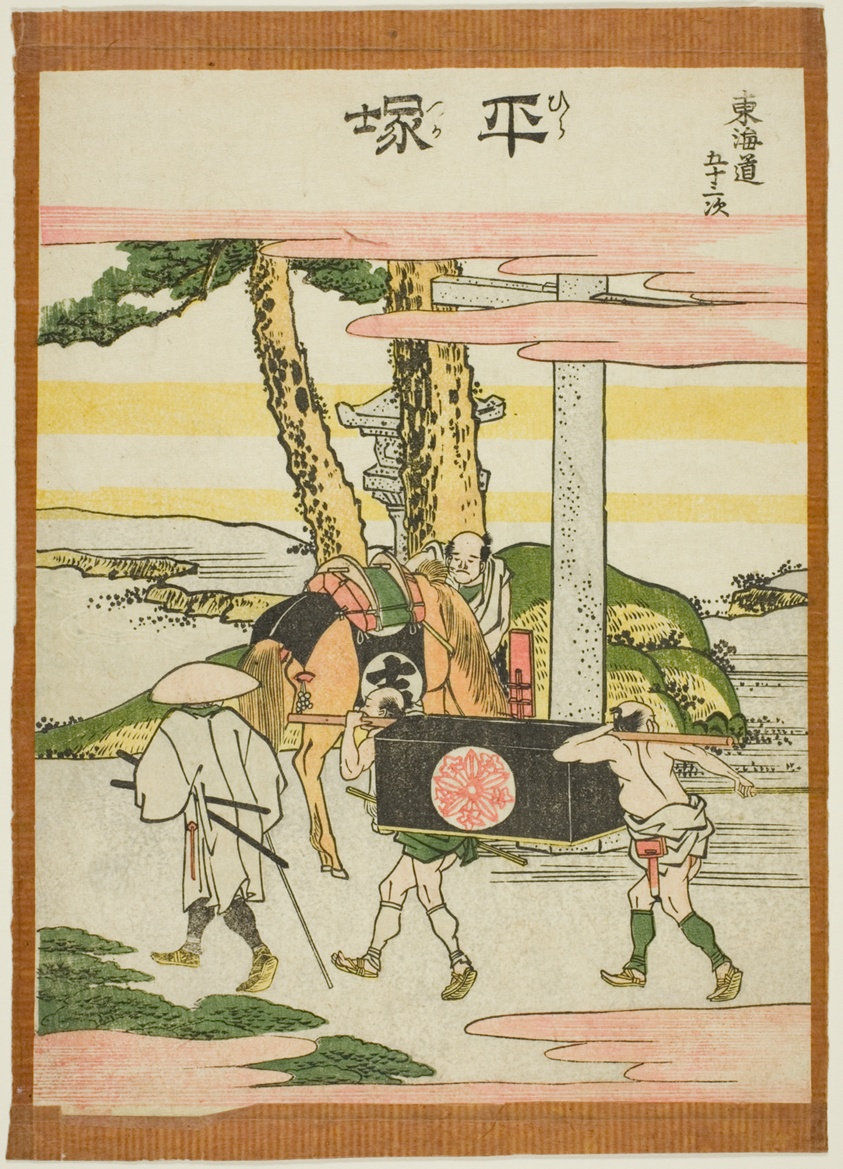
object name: Print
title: Hiratsuka, from the series "Fifty-three Stations of the Tokaido (Tokaido gojusan tsugi)"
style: Japanese (culture or style)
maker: Katsushika Hokusai 葛飾 北斎; Japanese, 1760-1849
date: c. 1806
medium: Color woodblock print; chuban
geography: Japan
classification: woodblock print; print; asian art